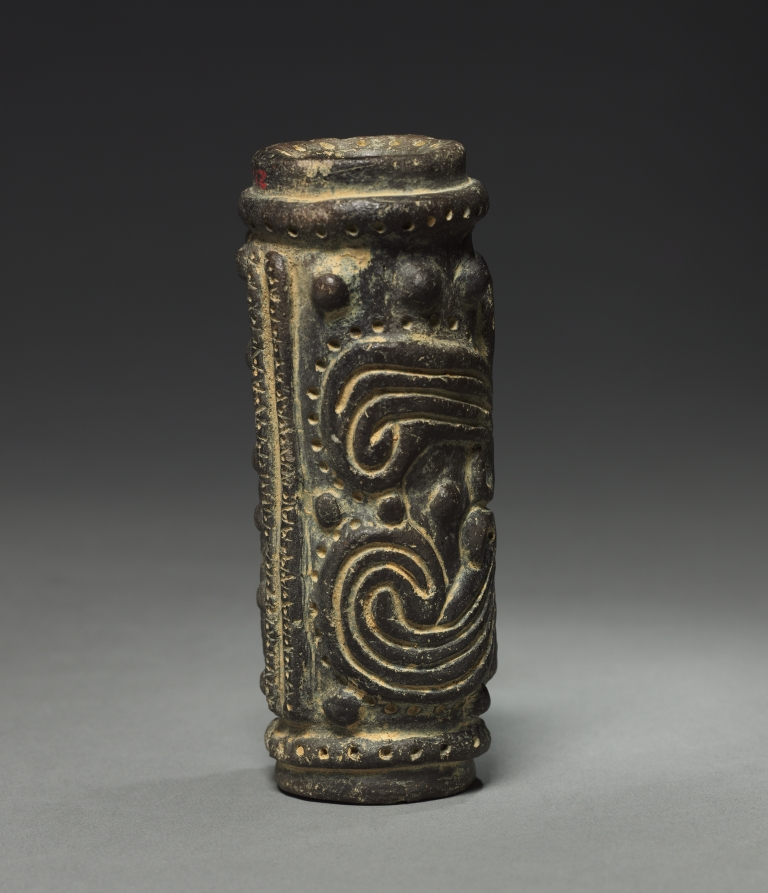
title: Roller Stamp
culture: Colombia, 19th-20th century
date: before 1921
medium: black ware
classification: Ceramic